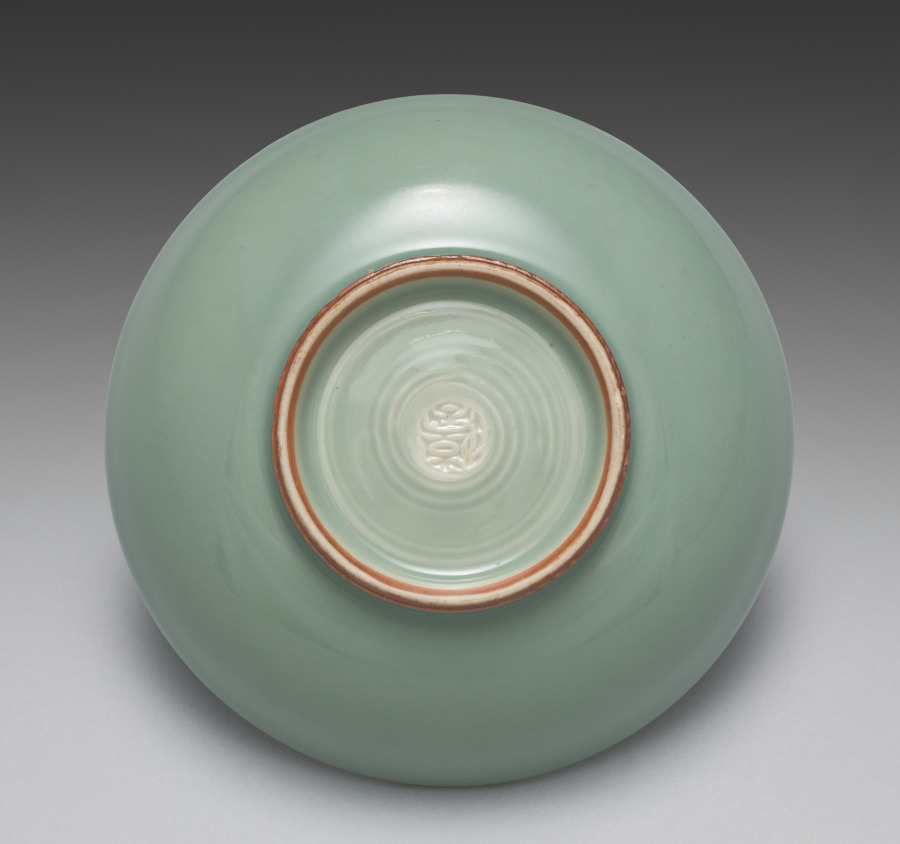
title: Dish from Dishes with Ivy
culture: Japan, Meiji period (1868–1912)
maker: Seifū Yohei III (Japanese, 1851–1914)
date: 1893–1914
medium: One from a set of five dishes; porcelain with green glaze and molded designs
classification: Ceramic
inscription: 清風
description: Yohei III’s main output for his sophisticated clientele was in the form of tea sets and dining sets. He often produced in pairs, sets of five, or sets of ten. This set of five dishes with a green glaze and designs of ivy vines in very low relief has unfortunately lost its box. These dishes are slightly larger than the other dishes, like CMA 2022.187, and so may have been not saucers but rather small plates for meals.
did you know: In his career, Seifū Yohei III created a range of dishes in green glazes.